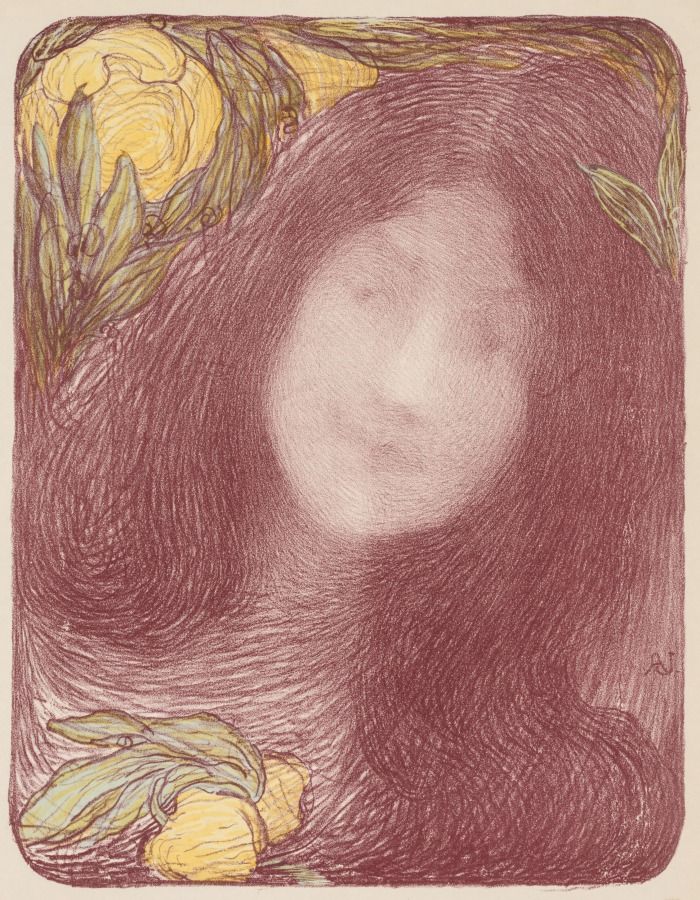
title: Under the Flowers (Sous les Fleurs)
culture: France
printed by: Imprimerie Champenois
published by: : L'Estampe moderne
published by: Edmond François Aman-Jean (French, 1858–1936)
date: published 1897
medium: Color lithograph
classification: Print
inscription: On stone: AJ